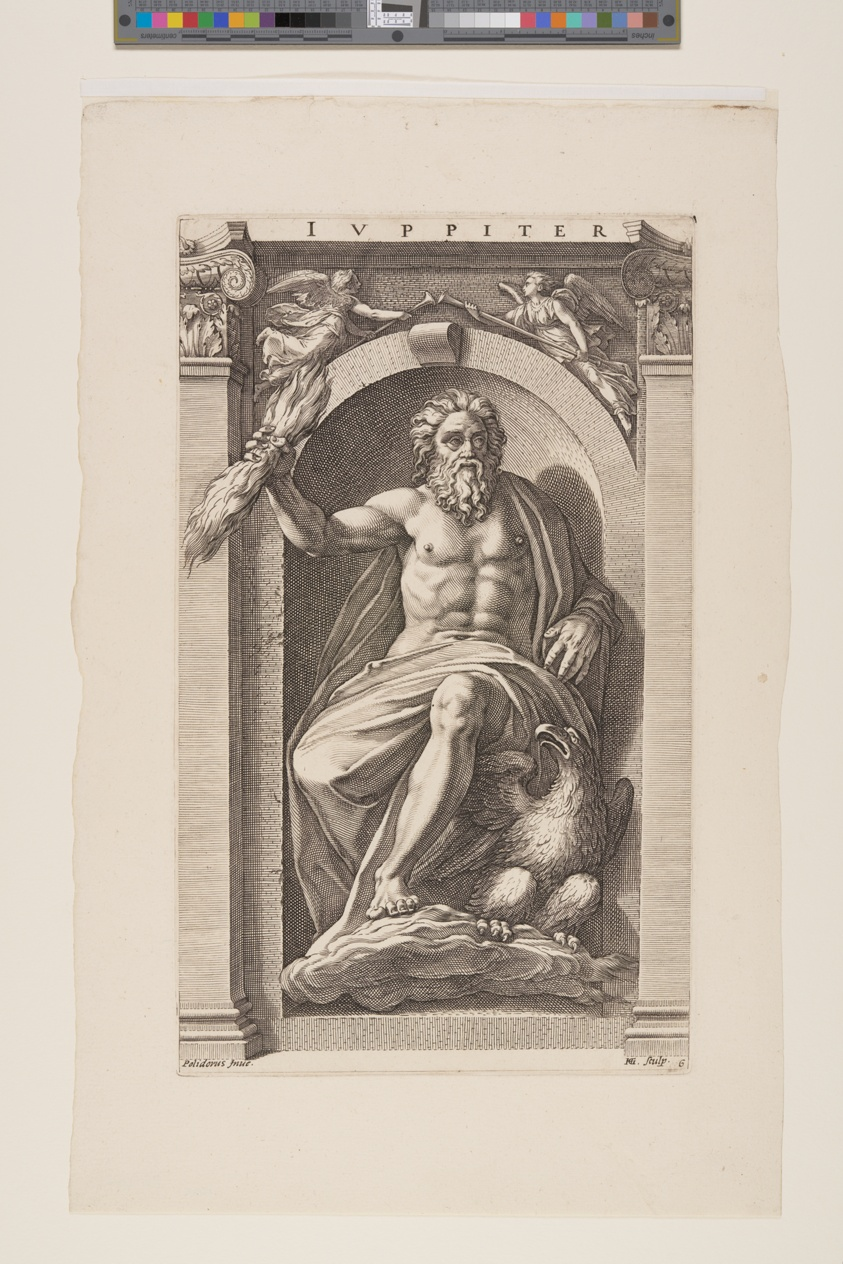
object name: Print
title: Jupiter, from Eight Pagan Gods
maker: Hendrick Goltzius (Dutch, 1558–1617); after Polidoro da Caravaggio (Italian, c. 1499–c. 1543)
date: 1592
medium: Engraving on ivory laid paper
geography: Netherlands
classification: print; paper; prints and drawing; engraving